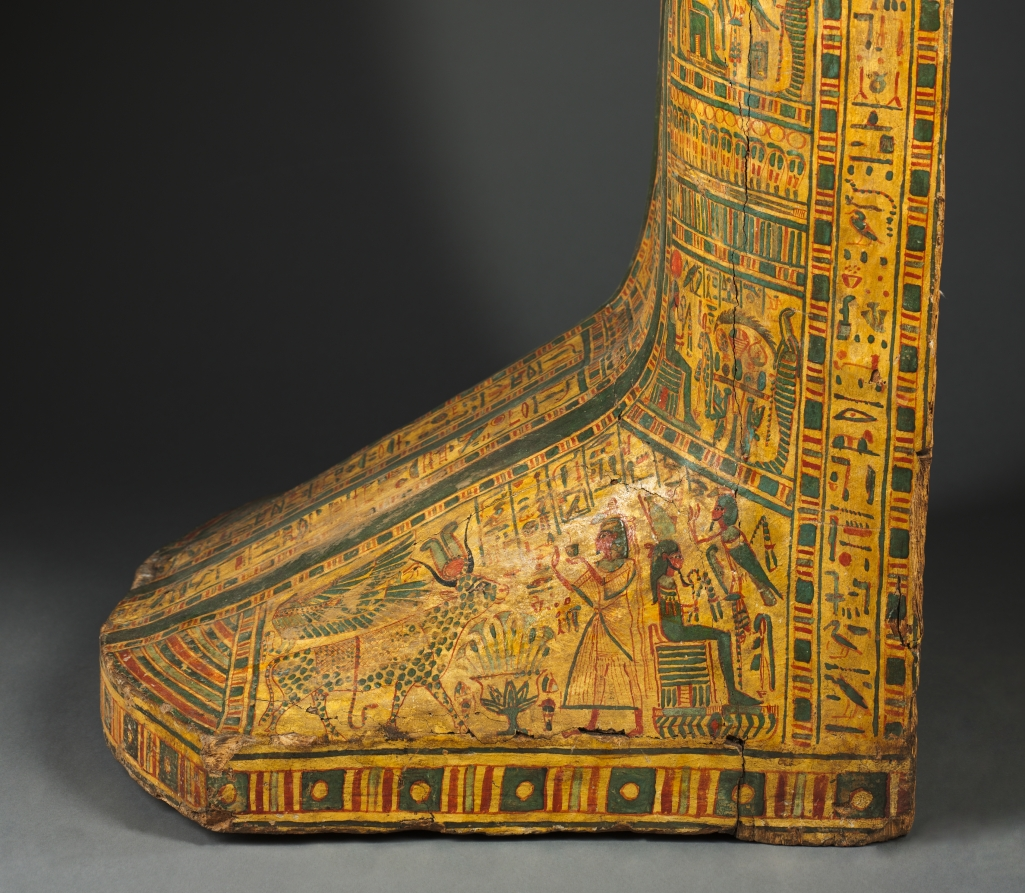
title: Coffin of Bakenmut (lid)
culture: Egypt, Thebes, Third Intermediate (1069–715 BCE), Dynasties 21–22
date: c. 1000–900 BCE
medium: gessoed and painted sycamore fig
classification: Funerary Equipment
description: The coffin of Bakenmut is one of the finest examples of painted wooden coffins made for the priests of Amen and their families at Thebes during Dynasty 21 and early Dynasty 22. The pharaohs of this time were no longer buried in the Valley of the Kings, but instead built tombs in the Delta, far to the north, where they resided. Security was lax in the Theban necropolis. The coffins and funerary goods of the wealthy citizens of Thebes were placed in unmarked and undecorated family tombs cut into the cliffs on the west bank of the Nile. All the care and detail that in more prosperous times were devoted to the decoration of the tomb chapel were now lavished on the elaborately painted coffins. Every available surface is crowded with religious scenes, images of funerary gods and goddesses, protective spells, and magical symbols. The deceased appears mummiform. An elaborate floral collar entirely covers the upper body, exposing only the separately attached hands (now lost). A pair of red "mummy braces" are crossed over the chest, their point of intersection marked by a winged sun disk. The lower body is covered with tiny figures modeled in gesso against a yellow background, which gives the effect of gold inlaid with glass or semiprecious stone. The decoration on the interior features two deified dead kings of Dynasty 18. Although these rulers had lived centuries before, memory of their greatness was still very much alive. The main scene near the top depicts Tuthmosis III, the great military pharaoh, who lived 500 years before Bakenmut. Posed as a mummy, the ruler wears a brilliant feathered garment enfolding him with falcon’s wings. The scene below features back-to-back seated images of Amenhotep I, regarded as the patron of the Theban cemetery and worshiped as a local god there.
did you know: Originally another smaller coffin was placed inside this outer coffin and in that the deceased with a mummy board would have rested.